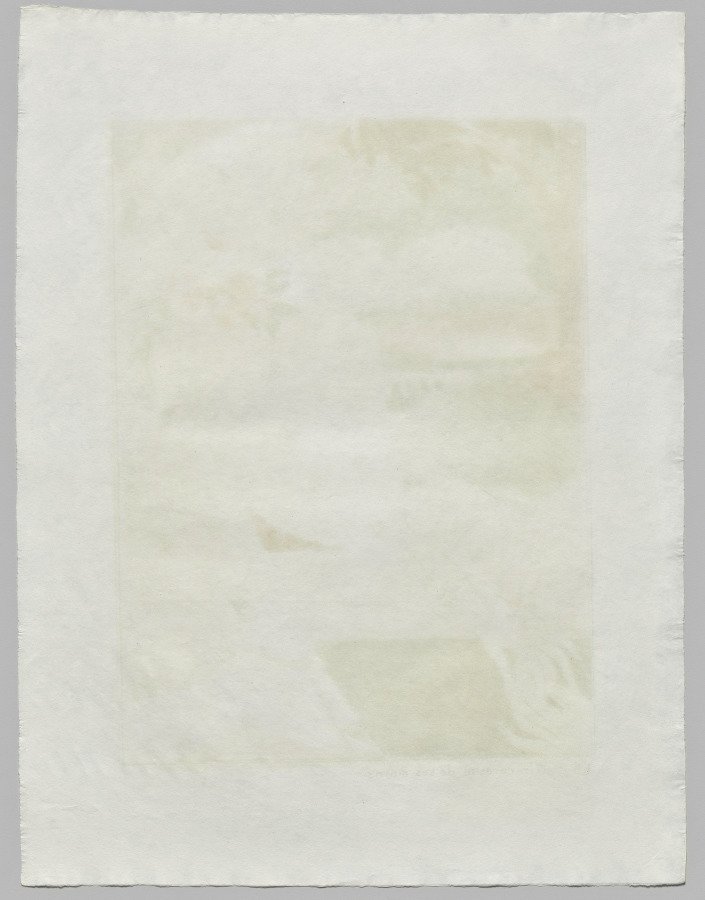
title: And It Is the Caress of Her Hands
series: Love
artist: Maurice Denis (French, 1870–1943)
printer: August Clot (French, 1858–1936)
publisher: Ambroise Vollard (French, 1867–1939)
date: 1899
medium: color lithograph on wove paper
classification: Print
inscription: Recto, lower left: “Et c’est la caresse de ses mains”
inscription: In graphite, recto, lower right: “Maurice Denis (signed)”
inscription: In graphite, recto, lower right: [illegible number]”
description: Maurice Denis belonged to the Nabis, a group of artists who came together in 1889 to pursue a radical new style informed by subjective experience and emotion. This print is from a series in which Denis explored his devotion to his wife, Marthe, by depicting her in a variety of settings alongside titles drawn from his own journal. The vague but evocative images were meant to encourage the viewer to draw connections to the theme and meditate on its meaning.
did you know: Maurice Denis was a devout Catholic and often drew visual connections between his wife, Marthe, the subject of this print series, and the Virgin Mary.